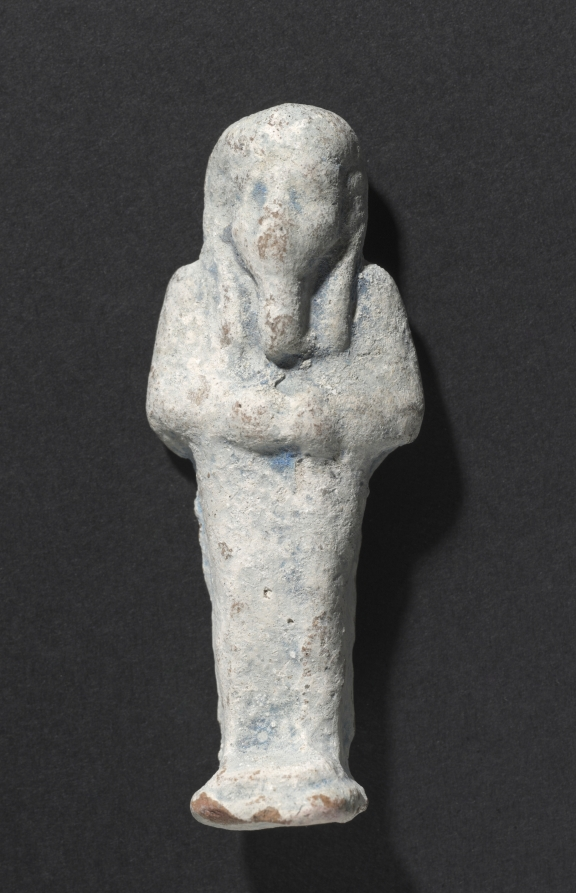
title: Shawabty of Ditamenpaankh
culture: Egypt, Late period (715–332 BCE), Dynasty 25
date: 715–656 BCE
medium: terracotta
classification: Funerary Equipment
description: High demand for shawabtys in the Late Period, a time when as many as 400 or more shawabtys were placed in the tomb with the deceased, gave rise to a specialized container for storing them: the shawabty box. This example is inscribed for the lady of the house, Ditamenpaankh, and was probably one of a pair originally made for her. The single-masted boat on the box's lid is perhaps an allusion to the pilgrimage of the deceased to the holy city of Abydos, the cult city of Osiris, king of the dead. The shawabtys inside are crude, mass-produced examples cast in an open mold. Made of terracotta, their blue paint imitates more costly shawabtys made of faience. As for the shawabty spell, it has been removed from its traditional location on the shawabty's front and relocated onto the sides of box, where it needed only to be written once, thus expediting production.